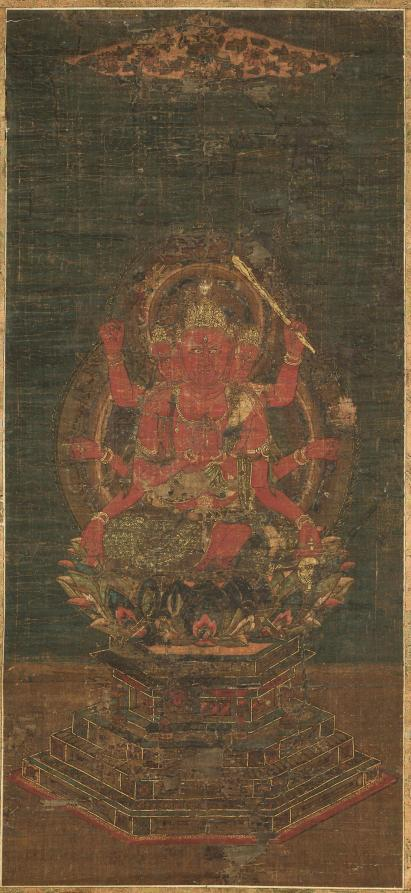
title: Wisdom King of Passion (Aizen Myōō)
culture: Japan, Muromachi period (1392–1573)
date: 1500s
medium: hanging scroll; color on silk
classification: Painting